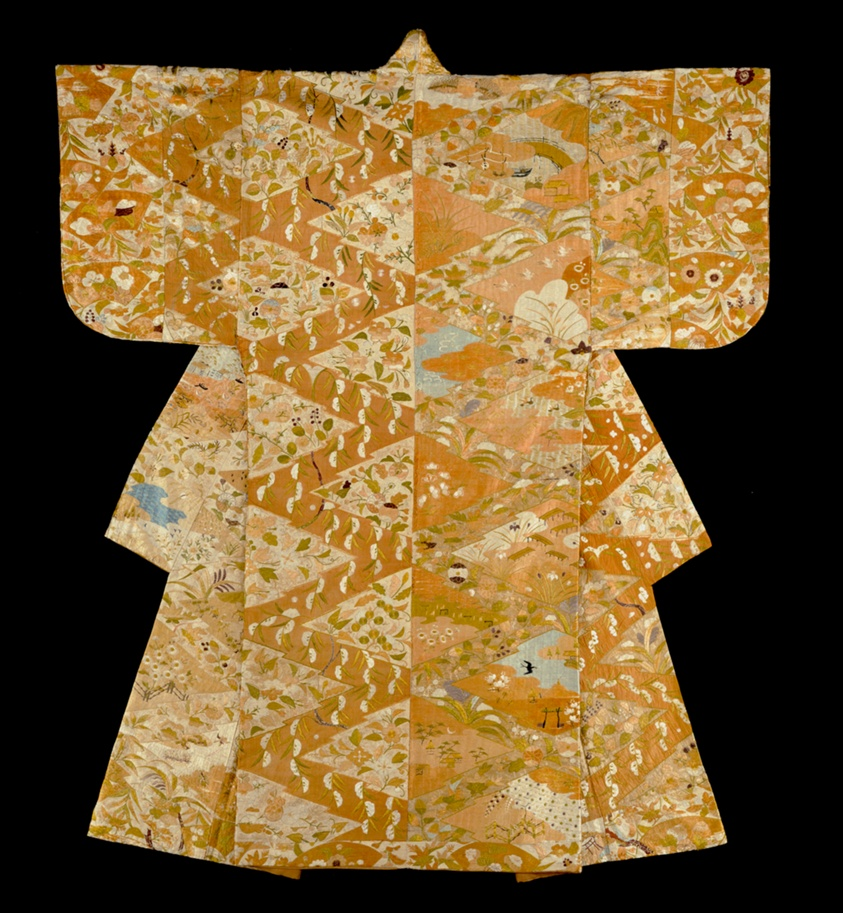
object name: Textile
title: Nuihaku (Noh Costume)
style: momoyama, Japanism, East Asian, asian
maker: Japan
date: Momoyama period (1568–1615), 16th century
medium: Silk, plain weave; patterned with resist dyeing, impressed gold leaf, and embroidered with silk in satin, single satin, surface satin and stem stitches; couching; lined with silk, plain weave; center back panels of silk, warp-float faced 3:1 twill weave self-patterned by areas of plain weave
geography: Japan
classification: textile; costume - needlework; needlework (visual works); costume; kimonos